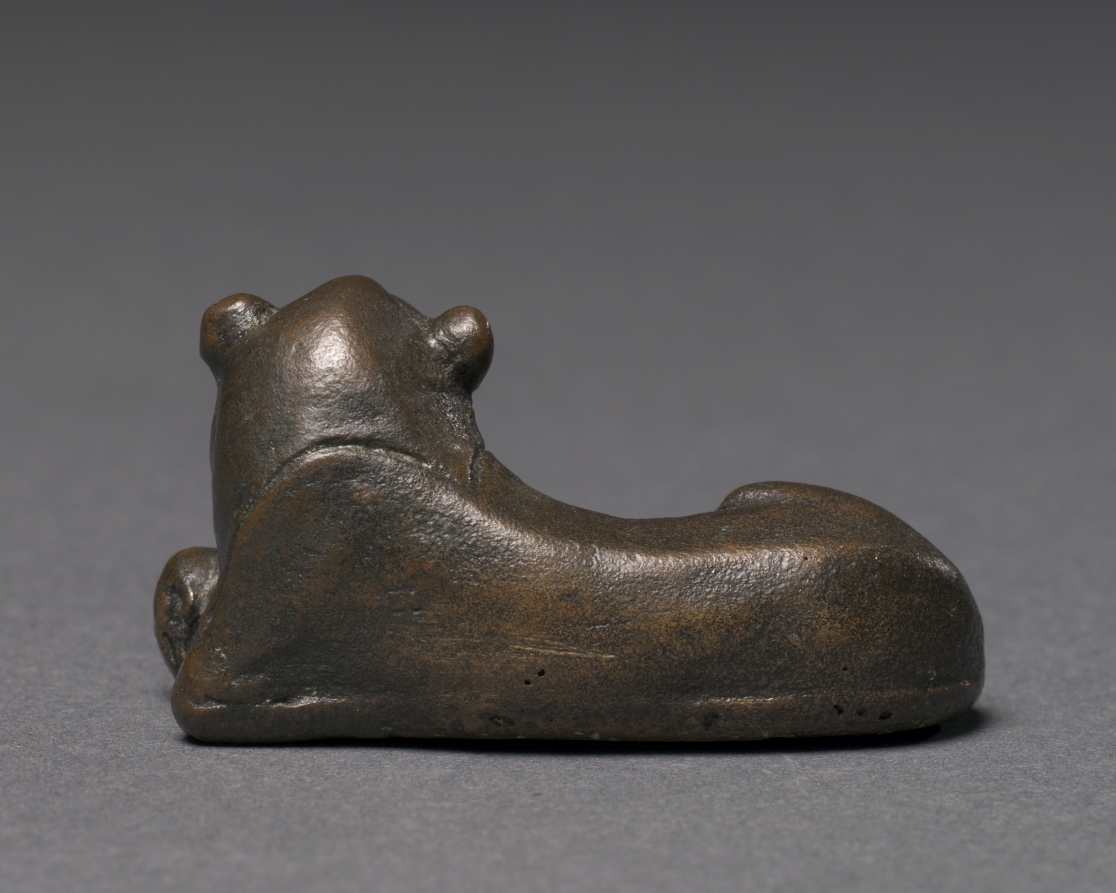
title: Weight in the Form of a Lion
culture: Egypt, New Kingdom (1540–1069 BCE), Dynasty 18, reign of Amenhotep III (1390–1352 BCE)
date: c. 1391–1353 BCE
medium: leaded tin-bronze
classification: Implements